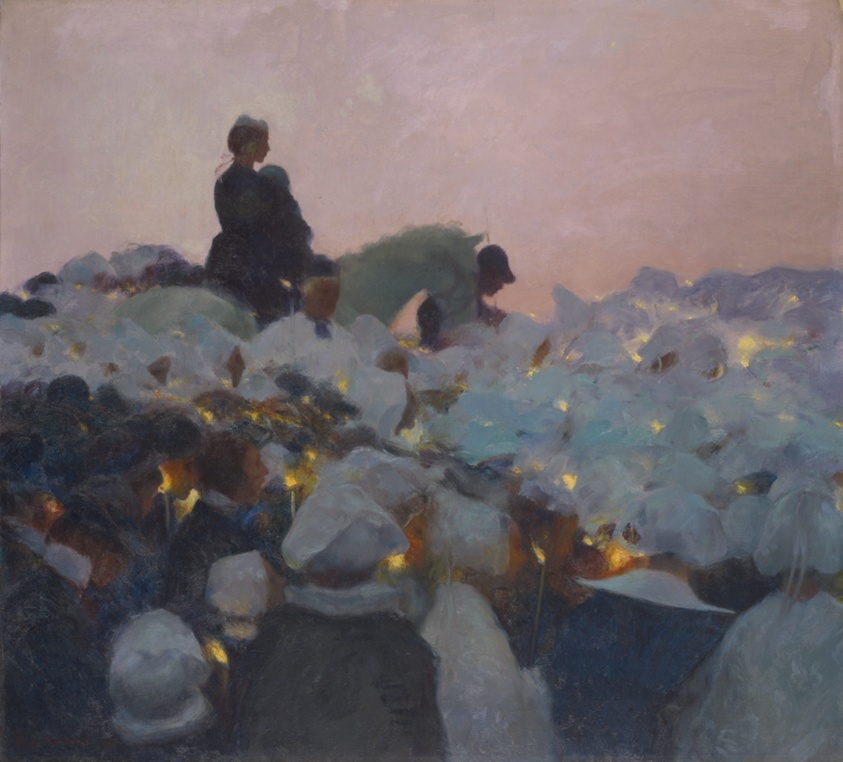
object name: Painting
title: Pardon in Brittany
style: nineteenth century, 19th century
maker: Gaston La Touche (French, 1854–1913)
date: 1896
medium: Oil on canvas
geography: France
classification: oil on canvas; paint; oil paintings (visual works); french; painting; european painting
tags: women, candleholder, candles, figures, France, headdresses, horse, men, Century of Progress, world's fairs, Chicago World's Fairs